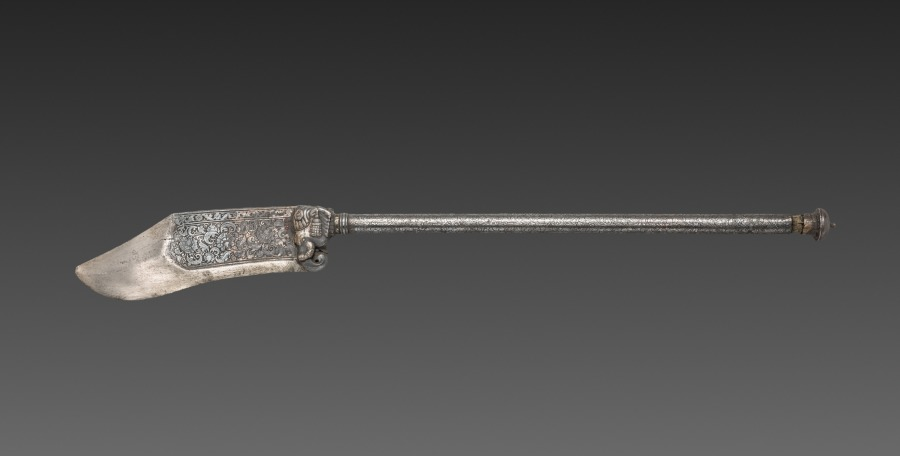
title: Battle Axe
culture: India, Sind, Kach tribe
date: c. 1800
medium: steel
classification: Arms and Armor